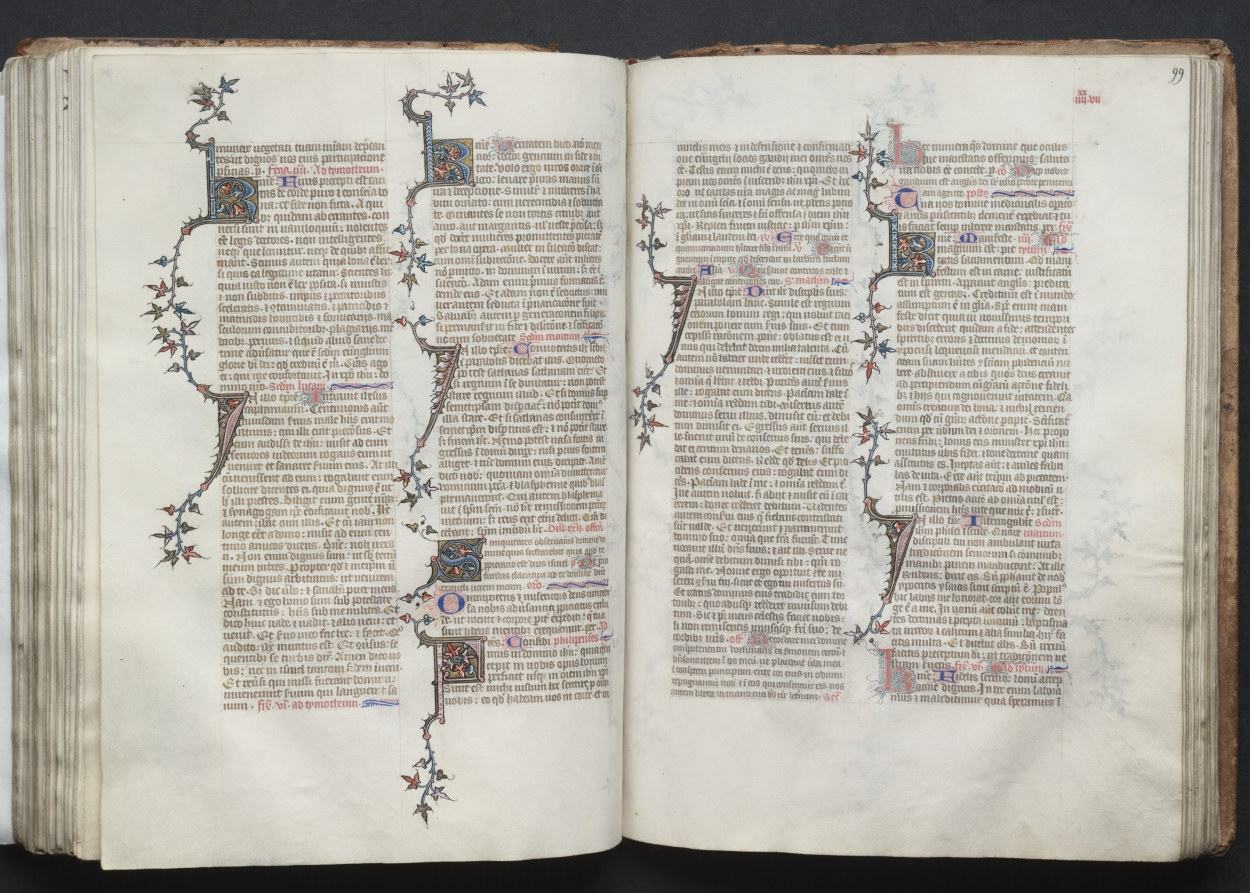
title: The Gotha Missal: Fol. 98v, Text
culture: France, Paris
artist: Master of the Boqueteaux (French)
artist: and Workshop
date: c. 1375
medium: ink, tempera, and gold on vellum; blind-tooled leather binding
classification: Bound Volume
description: The style and quality of this manuscript's decoration is typical of deluxe Parisian books made for aristocratic or royal patrons. Most of the book's decoration appears to be the work of the Master of the Boqueteaux, an artist active at the court of King Charles V (died 1380). His style was apparently shared by a number of book illuminators working in and around Paris. It is very possible that the Gotha Missal belonged to Charles V, but is not provable because the manuscript has no royal portraits and lacks a colophon. Given the book's magnificent decoration, however, it would seem that it was produced for a Valois prince, if not for the king himself. The manuscript receives its name from the German dukes of Gotha, its later owners.